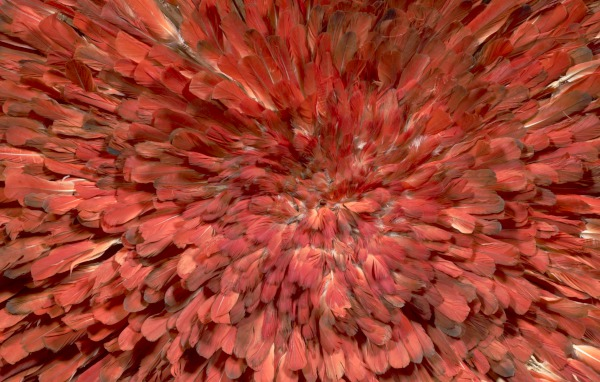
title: Headdress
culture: Africa, Central Africa, Cameroon, Grassfields region, Bamileke-style maker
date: 1900s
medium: African gray parrot feathers, wood, plant fiber, probably cotton, string, and colorant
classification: Garment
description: Hundreds of red tail feathers from the grey parrot (Psittacus erithacus) decorate this disk-shaped headdress. Only the king, some high-ranking individuals, and members of the all-male elephant society—known in different languages as Kuosi, Nekang, or Kem-ndze—wore this prestigious headgear at ceremonies and funerals. Typically, the headdress was worn pushed slightly back from the hairline. When used by members of the elephant society, it was accompanied by a cloth and glass bead mask (mbap mteng) in the shape of that animal, such as 1985.1082.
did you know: This headdress has an ingenious built-in storage system: it can be flipped inside out to encase the feathers within a rigid woven structure, protecting them during storage or travel.